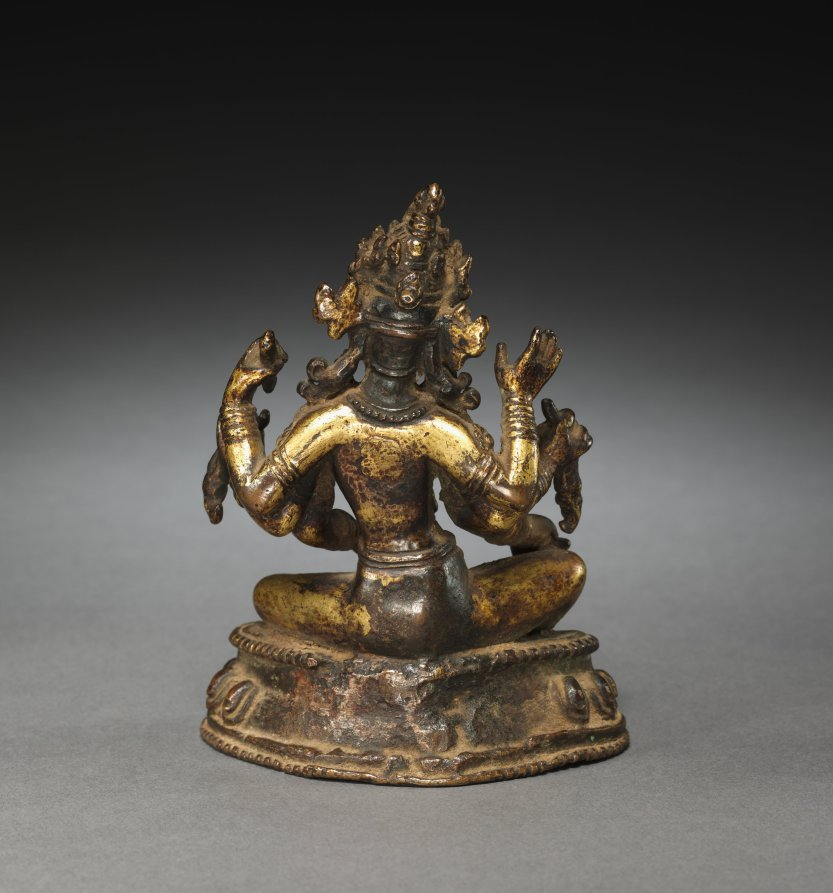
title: Seated Vasudhara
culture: Nepal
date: c. 1300s(?)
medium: brass or bronze; turquoise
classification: Sculpture